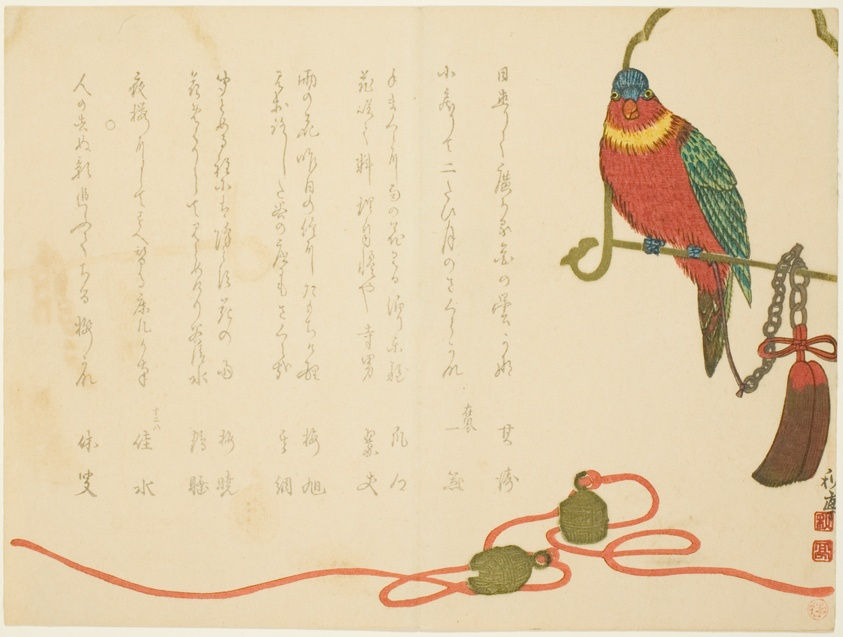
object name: Print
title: Parrot and Bells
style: Japanese (culture or style)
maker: Tanaka Shutei (Japanese, 1810-1858)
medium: Color woodblock print; surimono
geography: Japan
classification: woodblock print; print; asian art